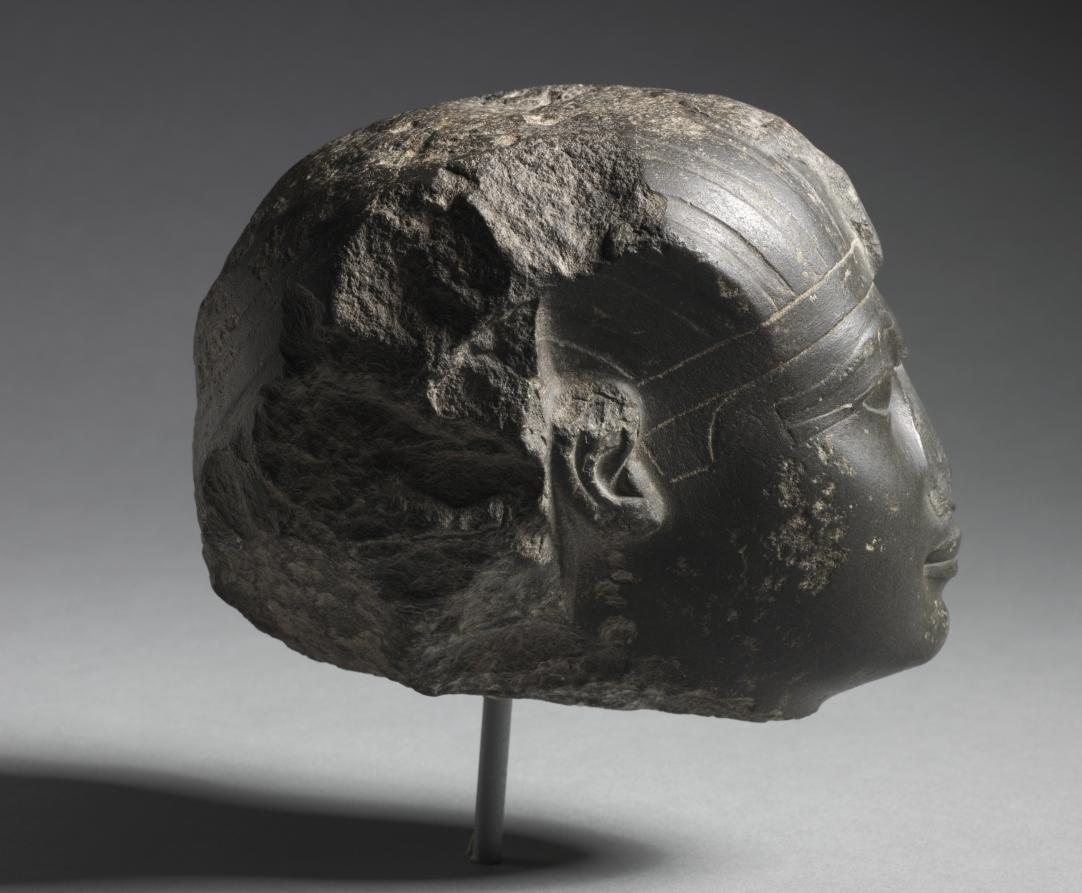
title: Head of Queen Hatshepsut (?)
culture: Egypt, New Kingdom (1540–1069 BCE), Dynasty 18, reign of Hatshepsut (c. 1479–1458 BCE)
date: c. 1479–1457 BCE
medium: graywacke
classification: Sculpture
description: Tuthmosis III was still a child when he came to the throne, so his stepmother and aunt, Hatshepsut, assumed the reins of government, first as regent, then as full-fledged king beside him. This beautiful head represents either Hatshepsut or Tuthmosis III, whose facial features are notoriously difficult to tell apart. They ruled together for 22 years, and presumably the same sculptors worked for them both. Very likely the sculptors themselves did not know whose statue they were working on until the final inscription was added.